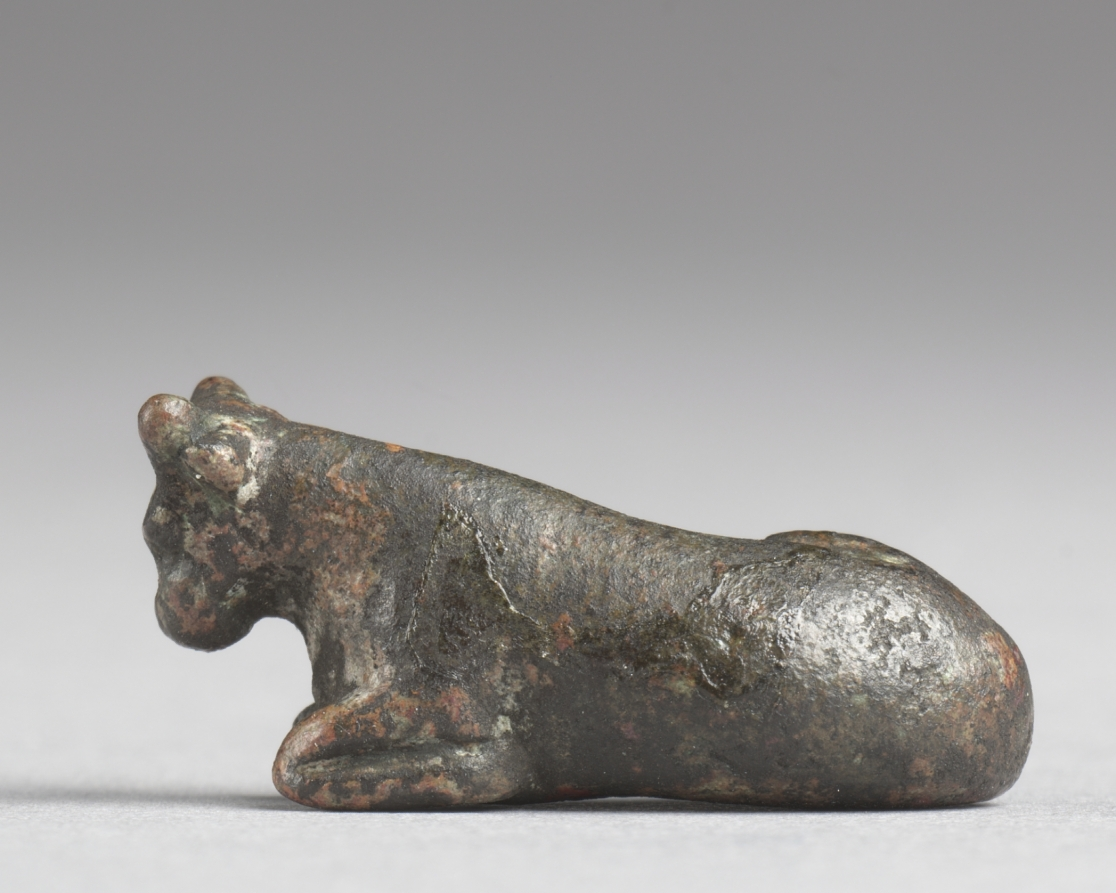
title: Weight in the Form of a Bull or Cow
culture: Egypt, New Kingdom (1540–1069 BCE), Dynasty 18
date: 1540–1296 BCE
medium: tin-bronze, solid cast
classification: Implements